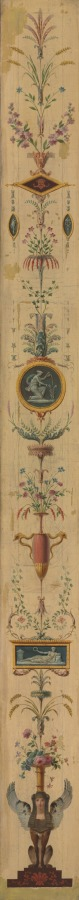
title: Decorative Panel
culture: France, 18th century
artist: Pierre Rousseau (French, 1751–1829)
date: 1790s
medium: oil on canvas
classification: Painting